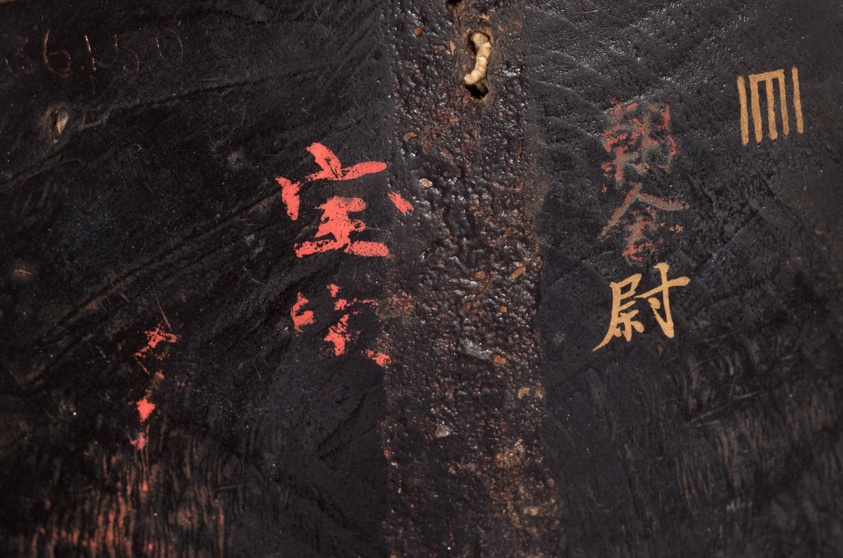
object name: Mask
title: Asakurajô (Old Man Asakura) Noh mask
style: Japanese (culture or style)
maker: Japan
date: 16th century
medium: Japanese cypress, colors, and horsehair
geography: Japan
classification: wood; masks; asian art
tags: masks